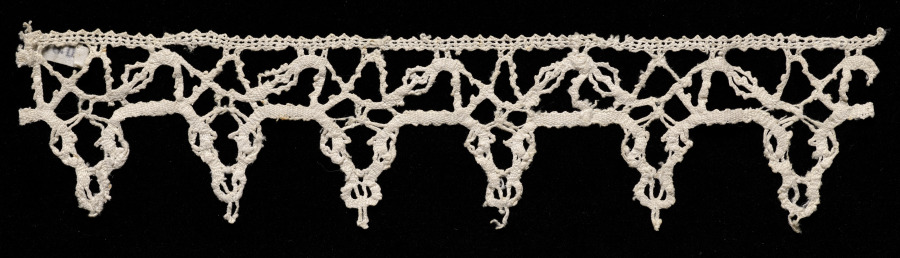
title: Lace Edging with Points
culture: Italy, Venice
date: 1500s–1600s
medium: Bobbin lace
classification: Lace